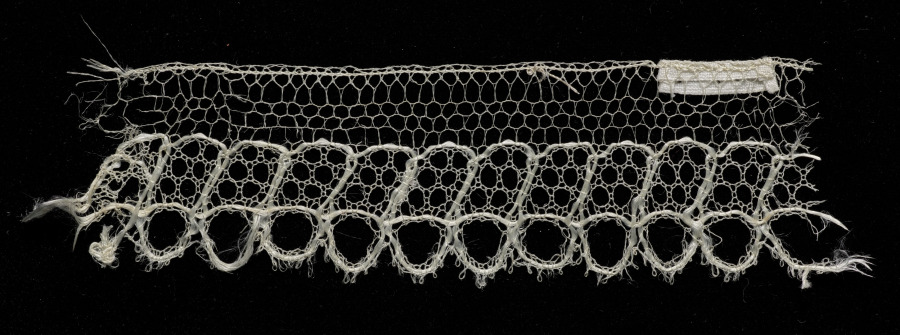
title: Lace Edging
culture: Spain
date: c. 1800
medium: Bobbin lace (blonde lace)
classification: Lace